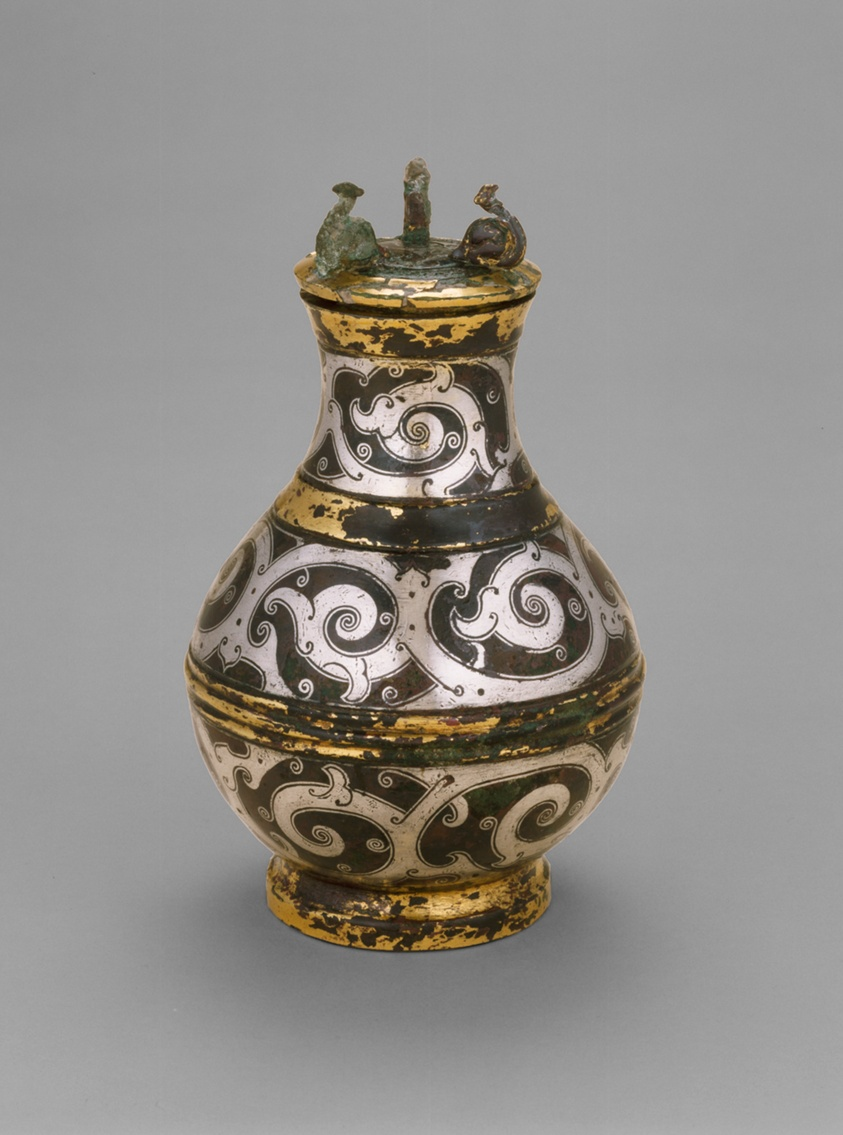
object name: Vessel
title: Covered Jar (Hu) 东周时期鎏金错银壶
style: Chinese (culture or style)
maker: China; reportedly from Jincun, Henan province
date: Eastern Zhou dynasty, Warring States period (480–221 B.C.), late 4th/3rd century B.C.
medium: Bronze inlaid with strand silver and gilded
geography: China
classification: vessel; vessel for serving drinks; bronze; metal; asian art